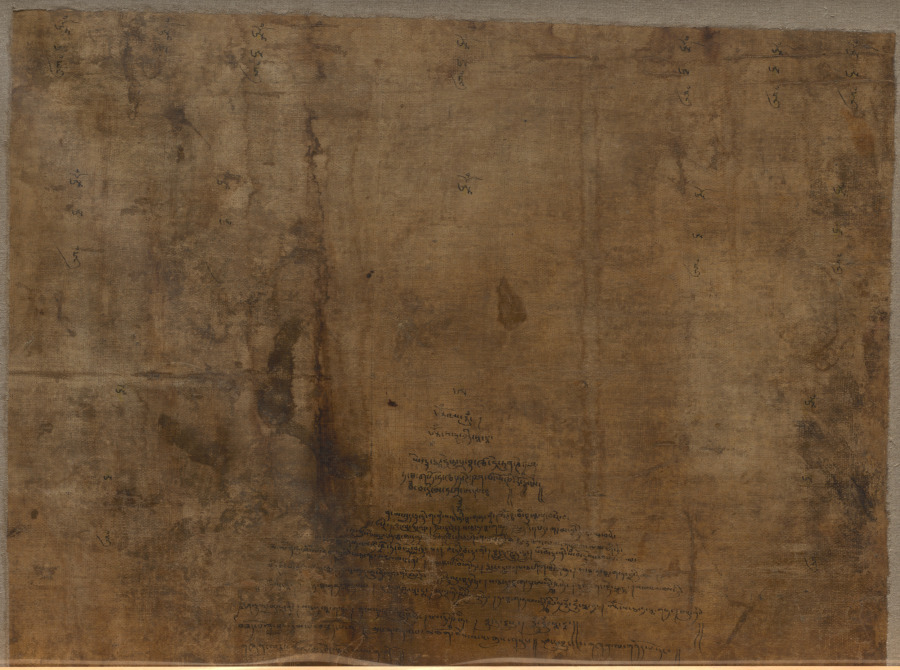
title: Tantric Buddha Vairochana as Vajrasattva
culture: Central Tibet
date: c. 1150–1200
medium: gum tempera, ink, and gold on cloth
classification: Painting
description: The seated Buddha dominating the composition is identified as Vairochana because of his hand gesture, the mudra communicating supreme enlightenment in which the index finger of one hand is grasped by the fingers of the opposite hand. His golden color and the tiny vajra—a six-pronged ritual object representing a thunderbolt—balanced on top of his finger suggest that he is in the guise of Vajrasattva, the summation of all enlightened beings. In his crown is the image of a monk, who is probably the guru of the donor, the small monastic figure at the lower right next to the lotus pedestal.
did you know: A mantra written behind the figures invokes their living presence in the thangka painting.